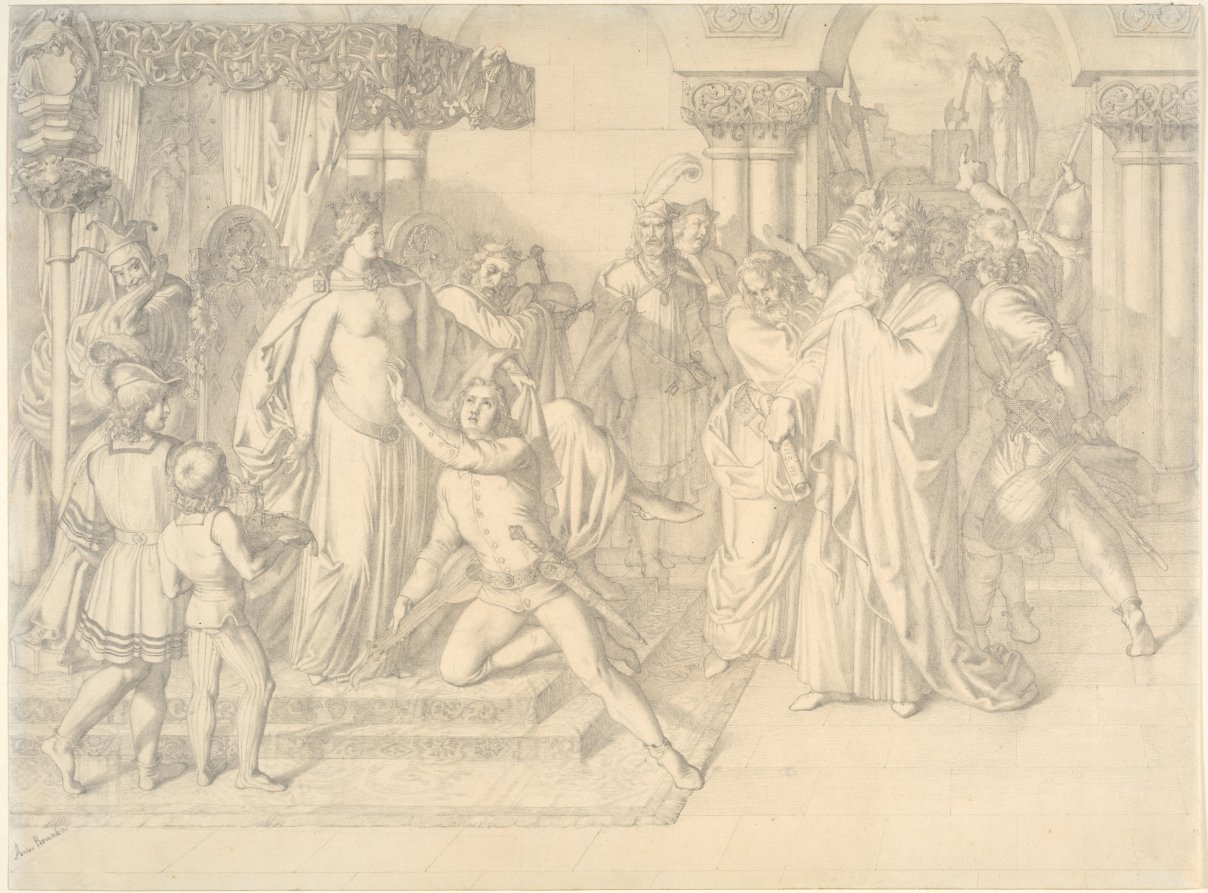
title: Singers' Contest on the Wartburg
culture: Austria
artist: Anton Romako (Austrian, 1832–1889)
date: c. 1853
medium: graphite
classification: Drawing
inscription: Signed, lower left in graphite: Anton Romako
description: The story of the Sängerkrieg (minstrel contest) originated from German folklore of the 13th century. According to the legend, six minstrels entered a competition in order to determine who best understood how to sing the praises of a prince. The victory of Heinrich von Ofterdingen enraged the other minstrels who contrived to have him executed. Romako depicted the dramatic moment when the young, beautiful Heinrich appeals to Countess Sophia and gains a reprieve, much to the chagrin of the bloodthirsty, jealous minstrels in the background.